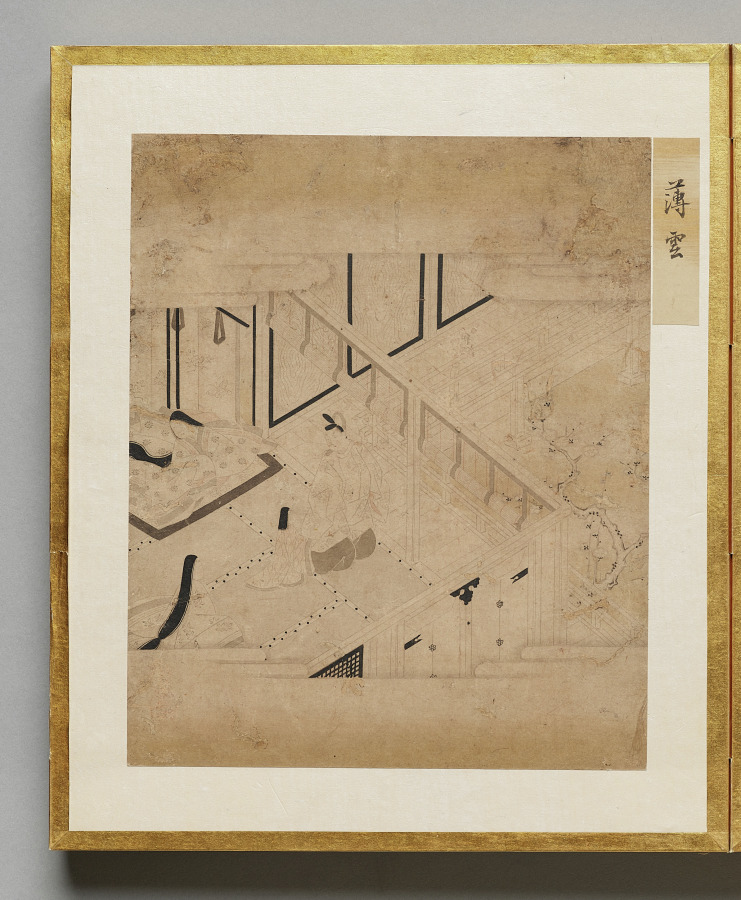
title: Rack of Clouds from Album of Illustrations for the Tale of Genji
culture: Japan, Edo period (1615–1868)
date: 1600s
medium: painting in an accordion-style album; ink, light color, and gold on paper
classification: Bound Volume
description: This album contains illustrations for the classic literary work the Tale of Genji, authored in the 1000s by Murasaki Shikibu, an aristocrat of the Heian period (794–1185) court. The scenes are painted in the “white drawing” (hakubyō) mode, in which a fine ink line is used to depict figures and spaces with great subtlety, punctuated only occasionally by traces of red pigment for a character’s lips, a detail of a garment, or a decorative element. These two scenes illustrate episodes from the chapters “Thin Veil of Cloud” (Usugumo) and “Barrier Gate” (Sekiya).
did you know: The illustrations are identified by chapter title in cartouches to the upper right of the paintings.